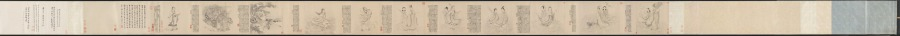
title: Nine Songs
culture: China, Yuan dynasty (1271-1368)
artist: Zhang Wo (Chinese, active c.1336–after 1364)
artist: Chu Huan (Chinese, active 1361)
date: 1361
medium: handscroll; ink on paper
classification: Painting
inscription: 7 colophons and 47 seals: 1 colophon, dated 1361, and 28 seals of Chu Huan 褚奐 (active c. 1361); 1 colophon, dated 1785, and 1 seal of Lu Shihua 陸時化 (1714-1779); 2 seals of Lu Yü-ch'ing (18th c.); 1 colophon, dated 1935, of Ye Gongchuo 葉恭綽 (1881-1968); 1 colophon, dated 1935, of Wu Hufan 吳湖帆(1894–1968); 1 colophon, dated 1938, and 1 seal of Wang Tongyu 王同愈 (1856-1941); 1 colophon, dated 1941, of Wu Huayuan 吳華源 (1893-1972); 1 colophon, dated 1942, and 9 seals of Xu Bangda 徐邦達 (1911–2012); 1 colophon, dated 1942, of Lang Jingshan 郎靜山 (1892-1995); 1 colophon, dated 1944, of Tang Yun 唐雲 (1910-1993); 6 seals of Wang Jiqian [C.C. Wang] 王季遷 (1907–2003).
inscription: Text of The Nine Songs written by Chu Huan at the end of each section.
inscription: 右離騷九歌圖，宋龍溟居士李公本，淮南張渥叔厚所畫妙絕當世。家藏請予書其辭目識于左。至正二十一年辛醜三月旦河南褚奐記。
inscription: Colophon by Lu Shihua 陸時化 (1714–1789): This scroll is fortunate to have been handed down from collections of the right people. Now, after 500 years, its condition is as good as when it was painted. I acquired this from Mr. Shen Guiyu [1673-1769], the President of the Board of Rites. The label is in his handwriting when he was 95 years old. I submit that Chu Huan (t. Shiwen) of the Yuan Dynasty was a native of Qiantang. His "seal" and li writings are in the style of Wu Rui. For example, in [Chu Kuei's] Ming ji lu [A list of masterpieces] is recorded the stele commemorating the restoration of the prefectural school of Kun-shan, the text of which was composed by Yang Weizhen in the twenty-first year of Zhizheng [1361]; and the calligraphy as well as the title in li style was by Chu Huan, who was at that time an assistant judge of the prefecture of Haining in the circuit of Hangzhou. Zhang Wo's zi is Shuhou (叔厚). His literary name is Zhen Qisheng (贞期生). According to [Gu Ying's] Yu shan cao tang ya jii, he liked to paint in the bai-miao or the "pure delineation" style after the method of Li Longmian [Li Gonglin 李公麟], which finds no peer among the ancient masters. This is agreed upon [by Pei Ch'iung] in his Qing jiang zhi who praised [Zhang Wo] as being quite learned and well-versed in many branches of the arts, especially figure painting. Recorded by Lu Shihua [The mountain dweller], listening to the pine, in the twelfth month of the yisi year [1785].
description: Painted in the baimiao, or fine-line drawing style, this ancient work demonstrates the literati’s use of abstract calligraphic brushwork for self-expression. The subject of the “Nine Songs”—songs associated with shamanistic rituals in the ancient Chu kingdom—had traditionally provided artists with myths and legends that they could explore and reinterpret in their own works.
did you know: Divided into eleven sections, the scroll contains illustrations by painter Zhang Wu followed by a transcription of the relevant verse by calligrapher Chu Huan.